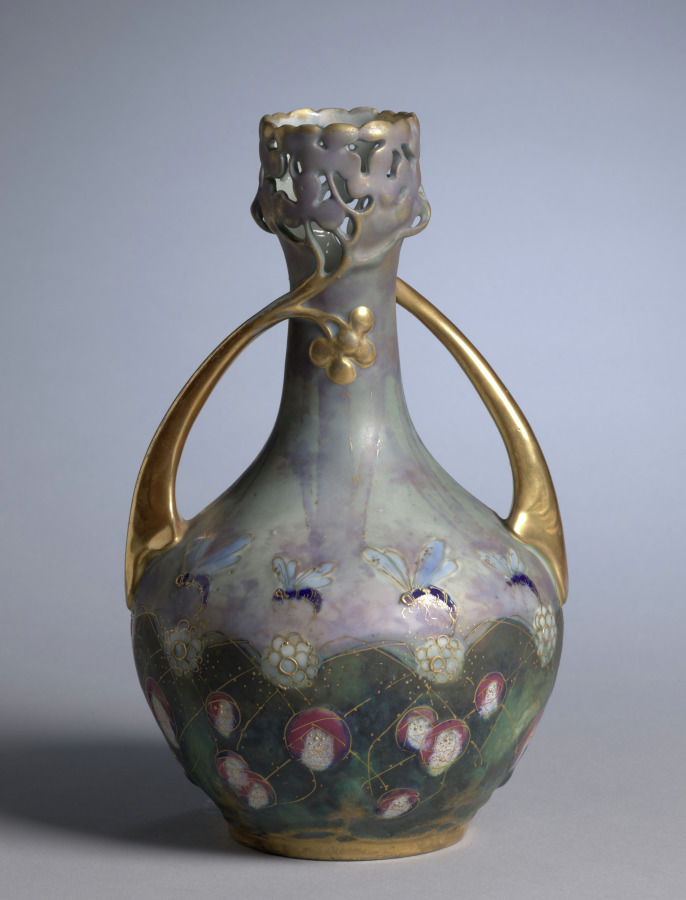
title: Vase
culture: Czech Republic, Turn-Teplitz, early 20th Century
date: c. 1900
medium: porcelain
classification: Ceramic